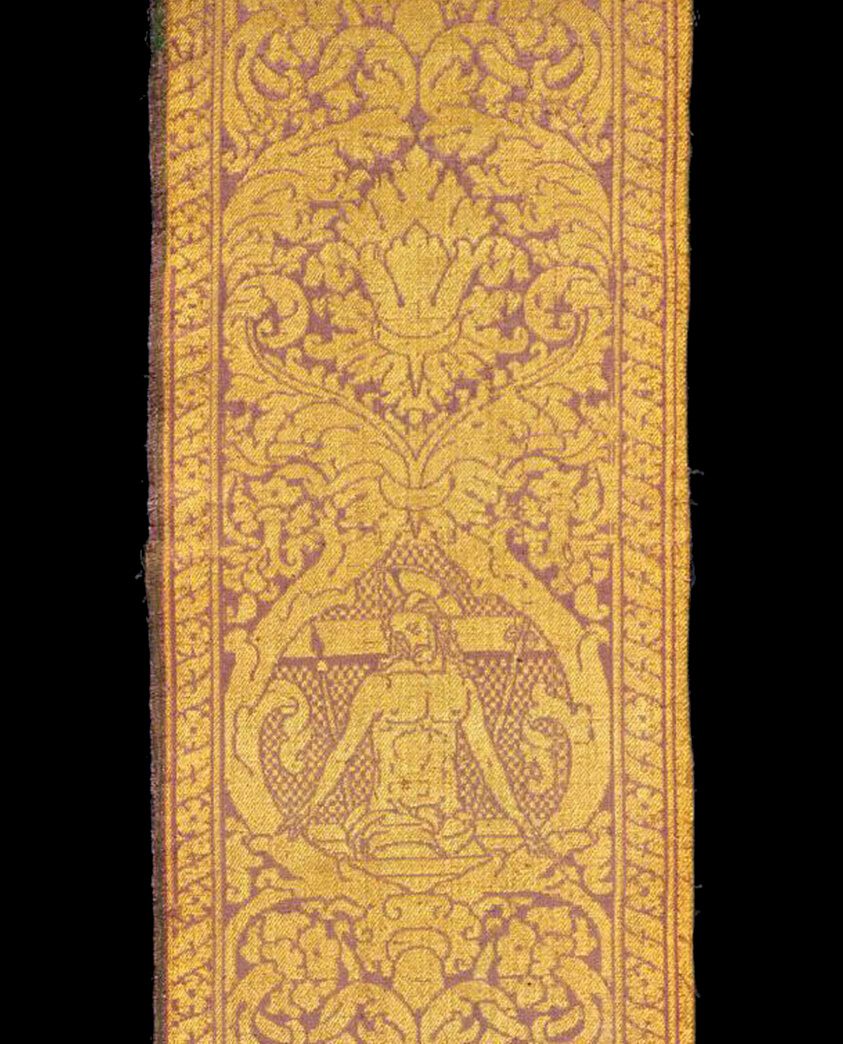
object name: Textile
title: Fragment (From an Orphrey Band)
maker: Italy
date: 15th century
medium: Silk and linen, compound weave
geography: Italy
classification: textile; weaving; liturgical